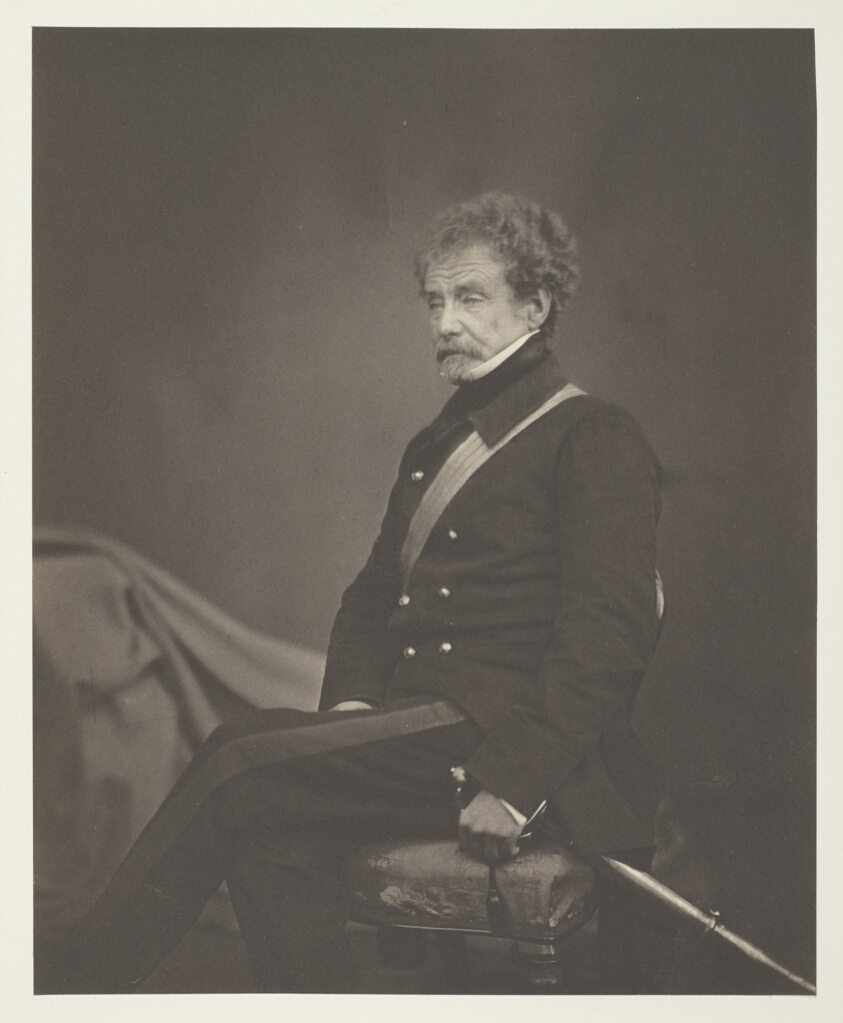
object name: Photograph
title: Lieutenant General Sir Colin Campbell, G.C.B.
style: 19th century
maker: Roger Fenton (English, 1819–1869)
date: 1855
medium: Salted paper print, from the album "Photographs Taken in the Crimea" (1856)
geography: England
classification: salted paper print; photographic process; photography; photograph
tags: Collected by Hugh Edwards, Crimea 1856